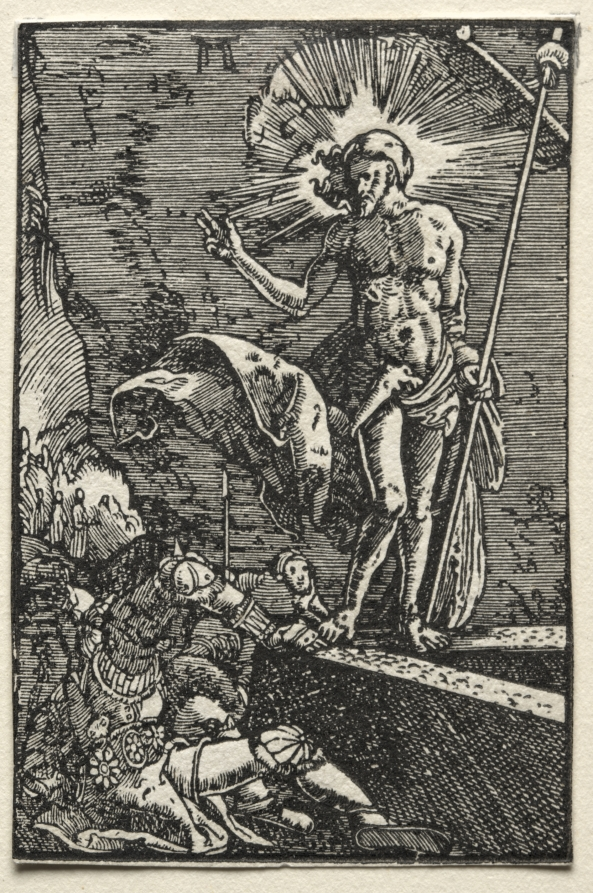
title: The Fall and Redemption of Man: The Resurrection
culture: Germany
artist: Albrecht Altdorfer (German, c. 1480–1538)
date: c. 1515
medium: woodcut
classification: Print